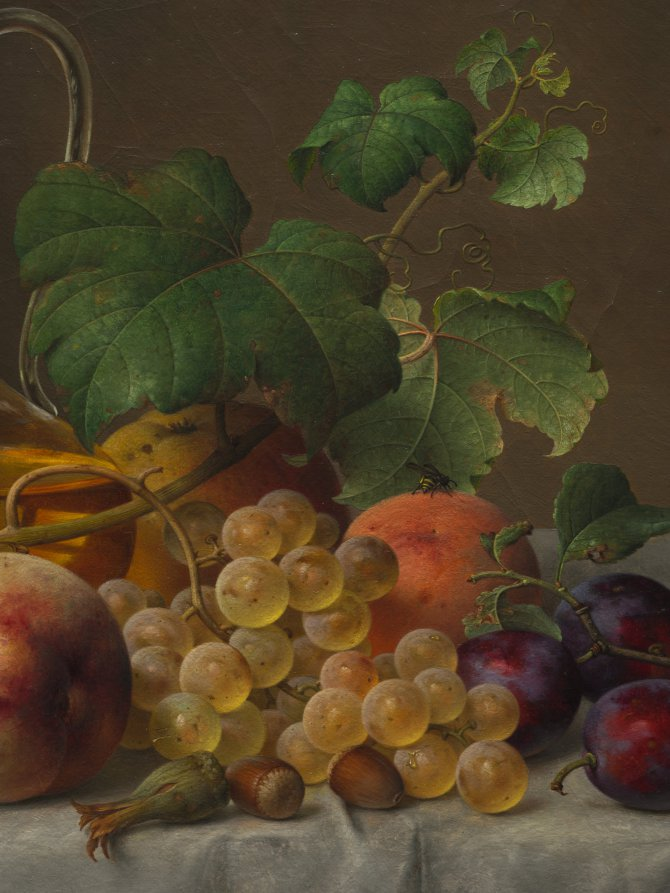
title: Still Life with Fruit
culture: Germany, 19th century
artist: Emilie Preyer (German, 1849–1930)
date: 1873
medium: oil on fabric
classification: Painting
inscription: Signed lower right corner: Emilie Preijer 1873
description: This composition contains many elements that show Preyer's technical abilities. She convincingly rendered the various textures juxtaposed in this composition, such as the contrast between the white cloth and the polished marble table, and the reflecting surfaces of metal, water drops, and glass versus the delicate skin of peaches and grapes. The knife that appears to project out over the side of the table is an indicator of Preyer's familiarity with the tradition of Dutch still-life painting. After early training with her father, Johann Wilhelm Preyer (1803-1889), Emilie Preyer painted her first still life in 1867. For study purposes, she visited museums in Dresden, Antwerp, and the Netherlands. She focused primarily on still lifes of fruit.